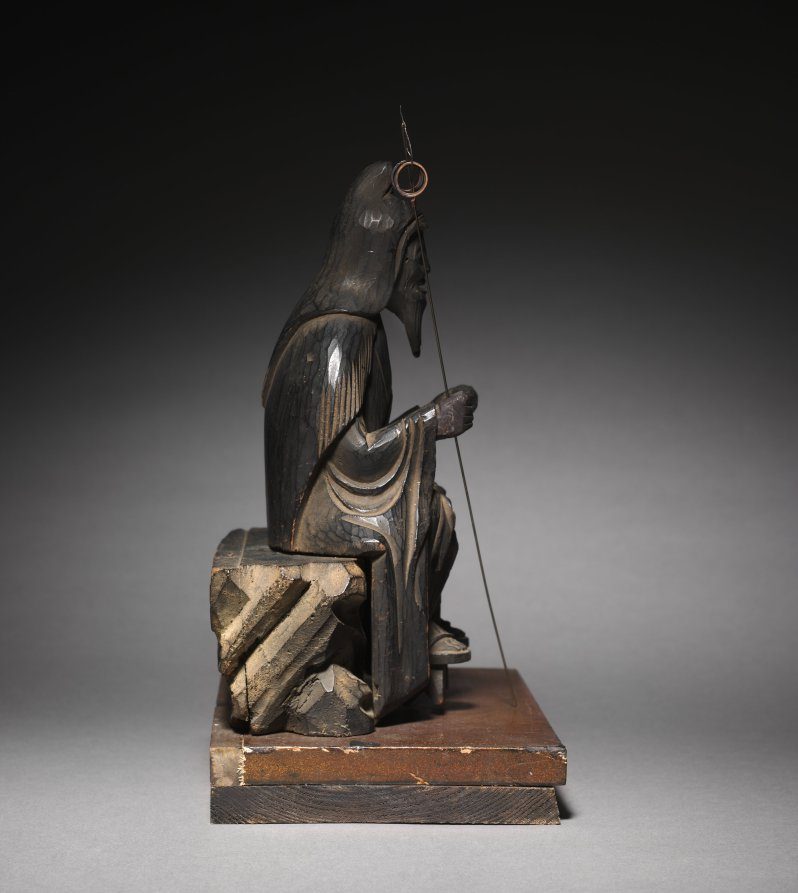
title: En no Gyōja with Zenki and Kōki (En no Gyōja)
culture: Japan, Edo period (1615–1868)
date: 1615–1868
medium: wood with paint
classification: Sculpture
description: This is one of a trio of figures identified as Enno Gyoja and his two attendants, Zenki and Kōki. The set follows the iconography of Shugendo, the traditional mountain ascetic practice in Japan. Enno Gyoja is depicted as a hermit-monk, seated on a rock attached to a modern base. He holds a staff in his right hand and a sutra in the left. The two attendants take the form of half-human, half-demonic figures and are regarded as a married couple.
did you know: These figures' miniaturized format allowed them to be portable devotional statuettes that worshipers could carry as they traveled.